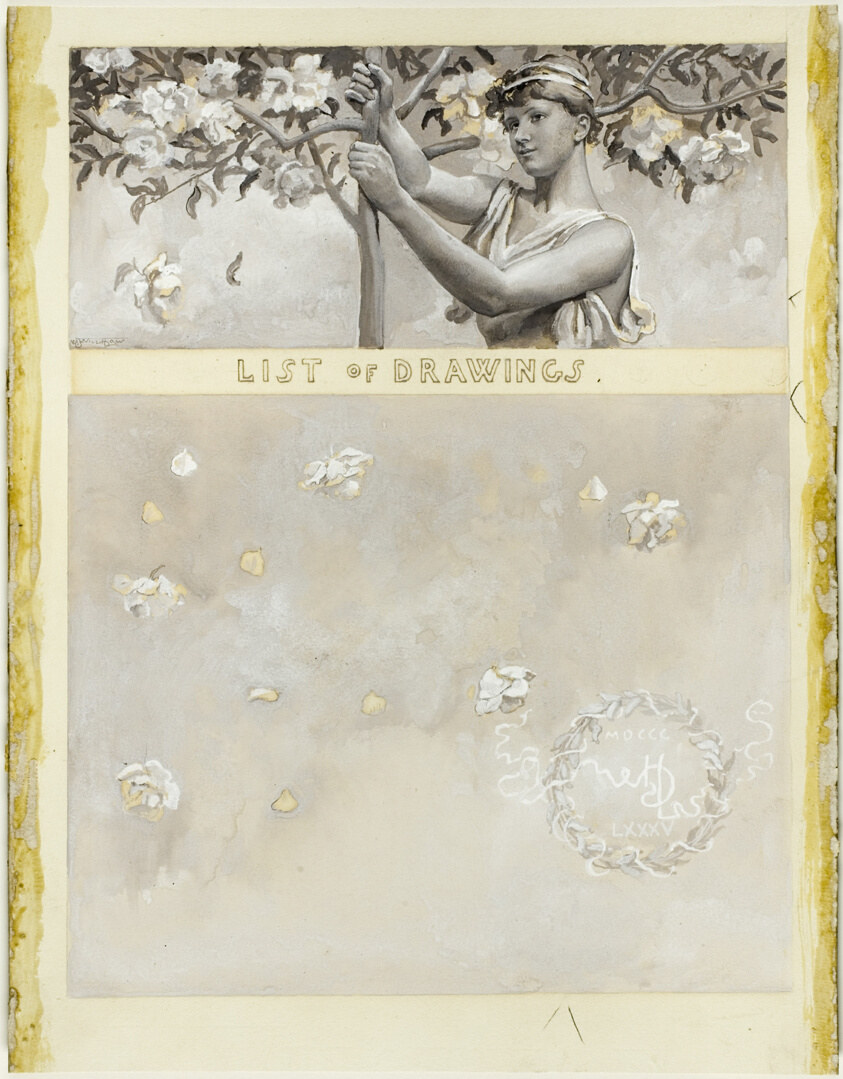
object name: Drawing and Watercolor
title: Title to List of Drawings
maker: Will Hicock Low (American, 1853-1932)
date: 1885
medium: Gray and white gouache, with touches of black gouache, over traces of graphite, on cream wood-pulp laminate board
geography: United States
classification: gouache; drawings (visual works); prints and drawing